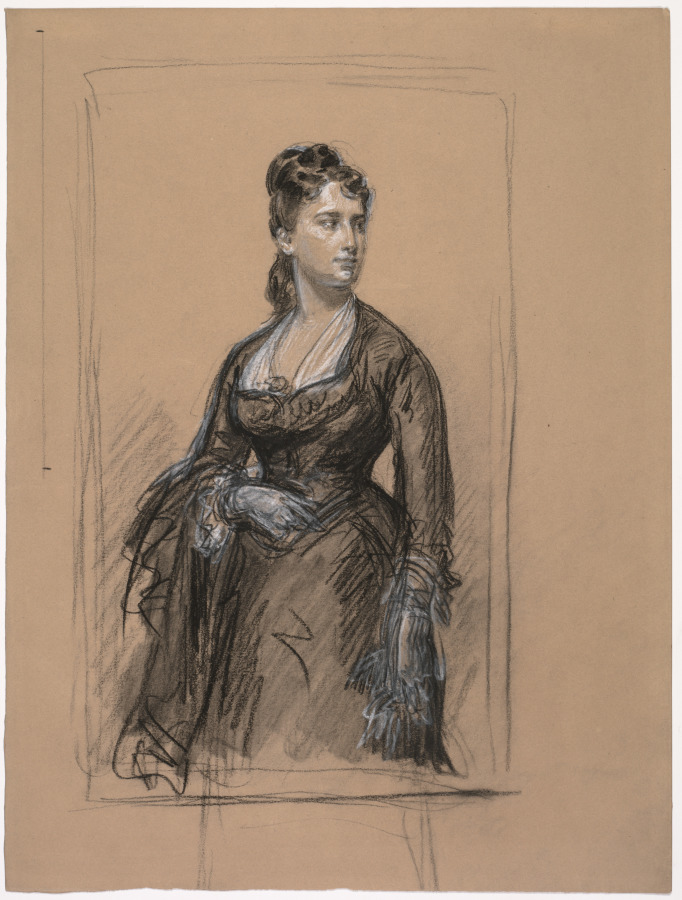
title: Portrait of a Woman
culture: France, 19th century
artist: Isidore Pils (French, 1813/15–1875)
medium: Charcoal and white chalk heightening on tan wove paper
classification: Drawing